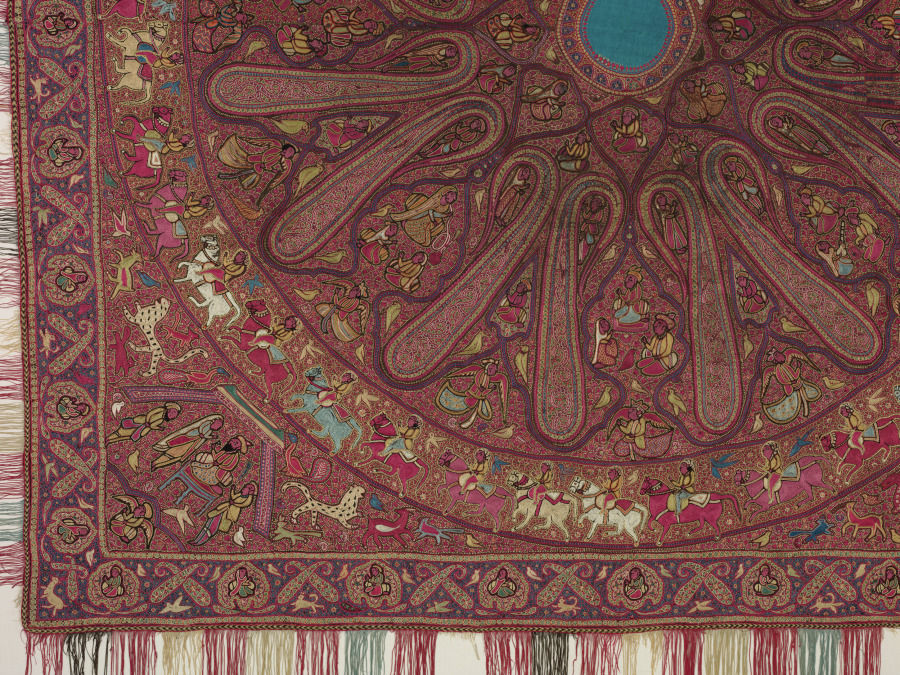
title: Square Shawl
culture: India, Kashmir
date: c. 1850–70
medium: Silk and silver filé, wool: chain stitch embroidery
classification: Embroidery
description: By the 1800s, the Himalayan foothill region of Kashmir was renowned for distinctive embroideries, and Kashmiri shawls were coveted by women throughout the British Empire. The center of this square shawl is in the form of an eight-petaled lotus, a symbol for the sun, and around it are the elongated forms of slender cypress trees, which became the inspiration for paisley. Every space is populated with figures: seated, standing, male, female, or playing musical instruments. Others are winged heavenly figures called peri. Birds are the only animals in these central spaces, suggesting a heavenly realm. In the next concentric ring riders in an equestrian procession alternate with flying birds. In the spandrels, the triangular sections between the circle and the square, are gatherings under a tent with animals. Some local Himalayan animals can be identified, such as the spotted snow leopard and the snake-eating markhor goat.